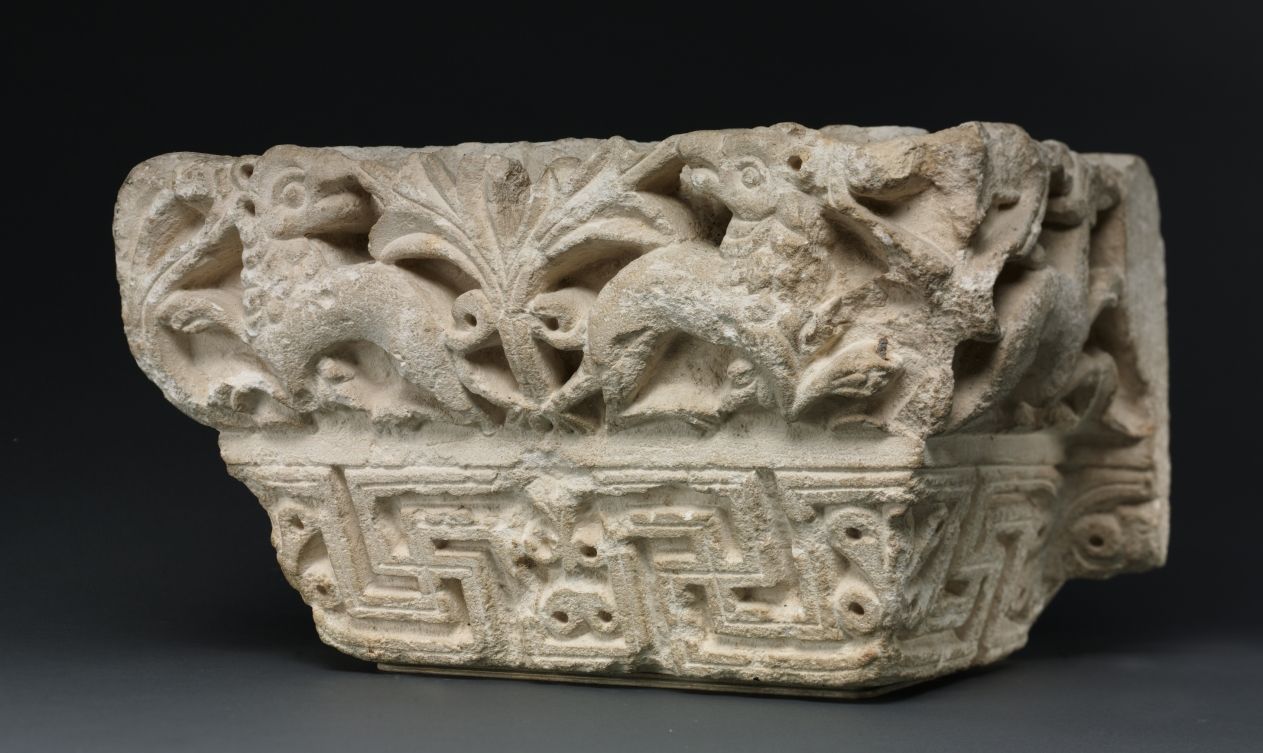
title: Engaged Capital with Animals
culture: Egypt, Coptic period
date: 400s - 500s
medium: limestone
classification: Sculpture